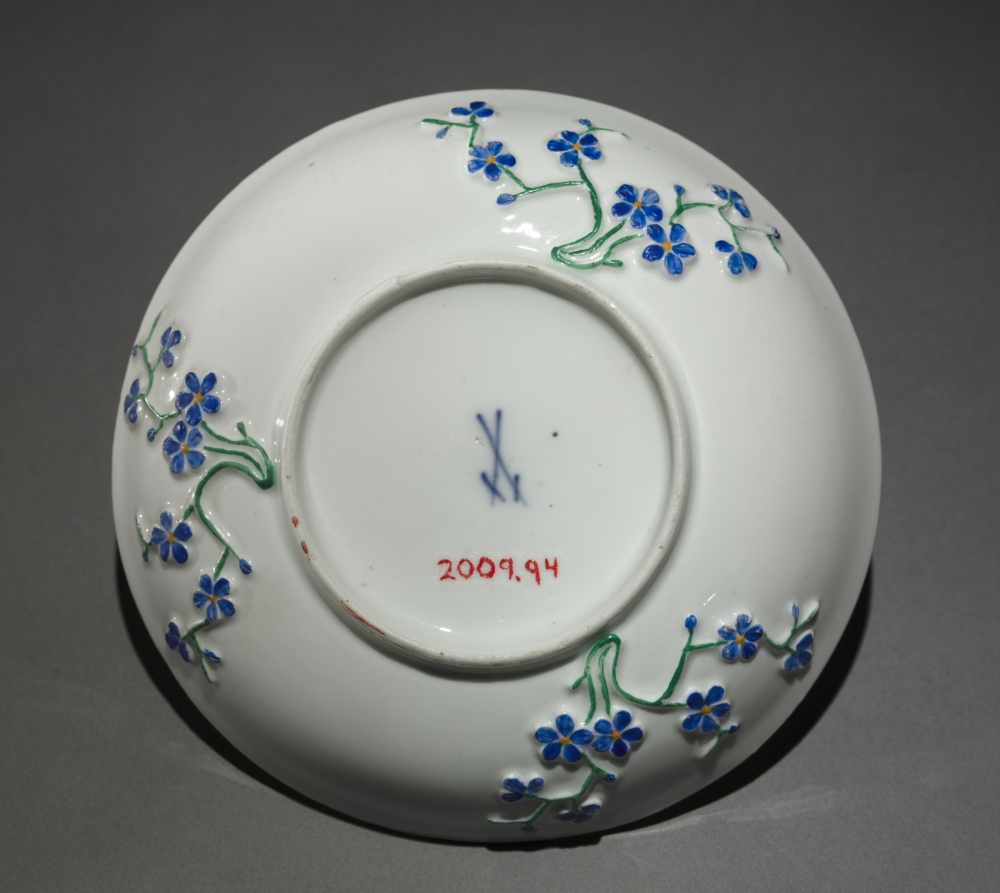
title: Saucer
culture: Germany, 18th century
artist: Meissen Porcelain Factory (German, est. c. 1710)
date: c. 1750–70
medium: porcelain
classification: Ceramic